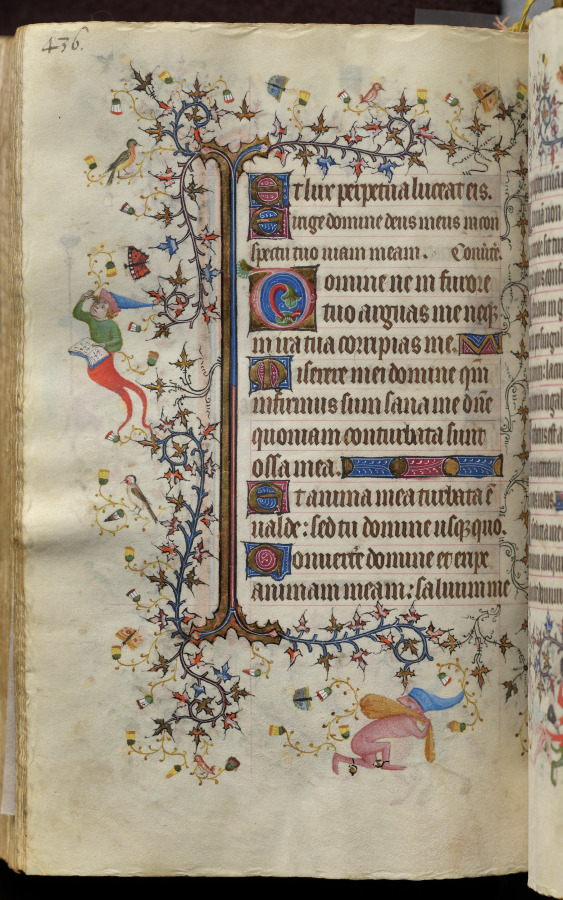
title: Hours of Charles the Noble, King of Navarre (1361-1425): fol. 212v, Text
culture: France, Paris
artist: Master of the Brussels Initials and Associates (French)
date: c. 1405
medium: ink, tempera, and gold on vellum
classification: Bound Volume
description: This precious volume was obviously highly prized by its owner, the French-born King of Navarre, who had his coat of arms painted on no less than twenty folios. Rather than directly commissioning this manuscript from a specific workshop, it seems that Charles the Noble acquired his book of hours -- perhaps ready-made for the luxury market -- while on a trip to Paris in 1404-05. A collaborative effort, six painting styles are evidenced within the pages of this codex, those of two Italians, two Frenchmen, and two Netherlanders. The painter who was responsible for the planning and decoration of the book, and who produced seventeen of the large miniatures, was a Bolognese artist known as the Master of the Brussels Initials. His principal assistant, responsible for most of the borders, was a Florentine who signed his name "Zecho" da Firenze on folio 208 verso.